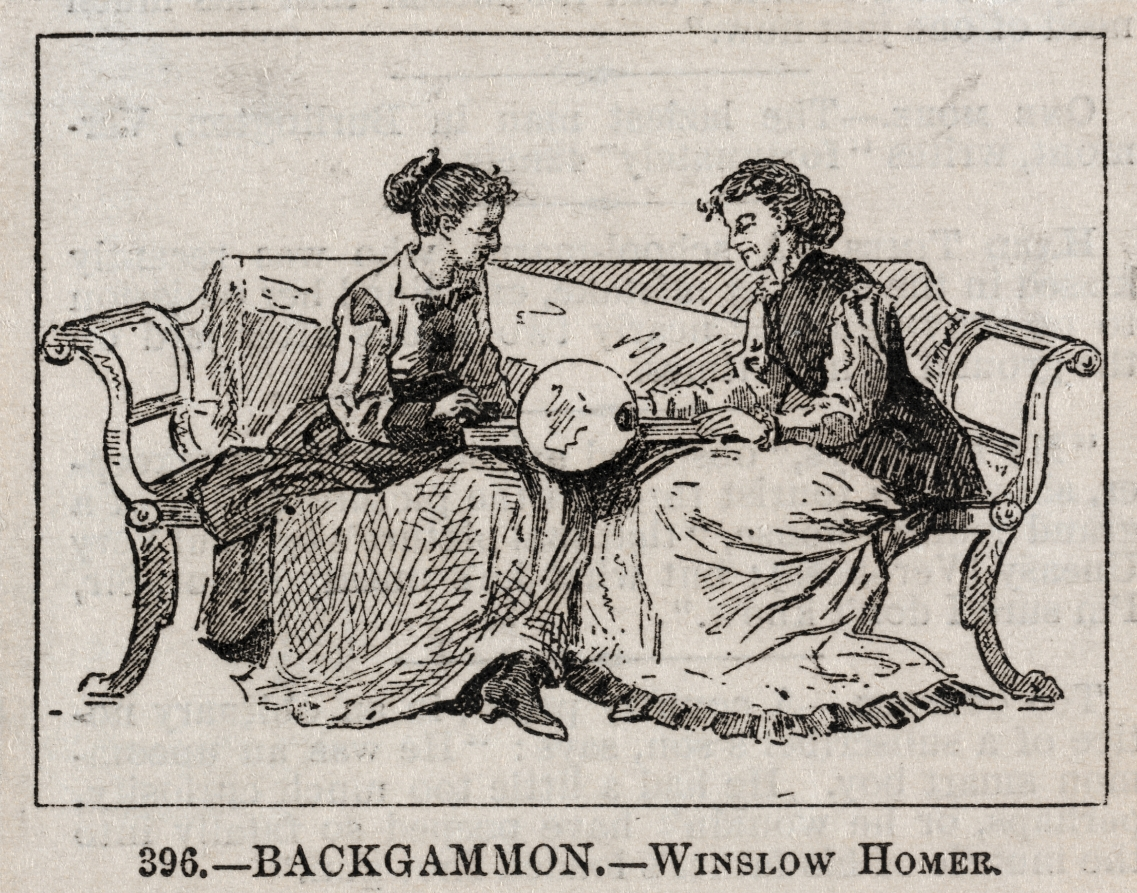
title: Backgammon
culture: America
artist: Winslow Homer (American, 1836–1910)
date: c. 1877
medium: wood engraving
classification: Print